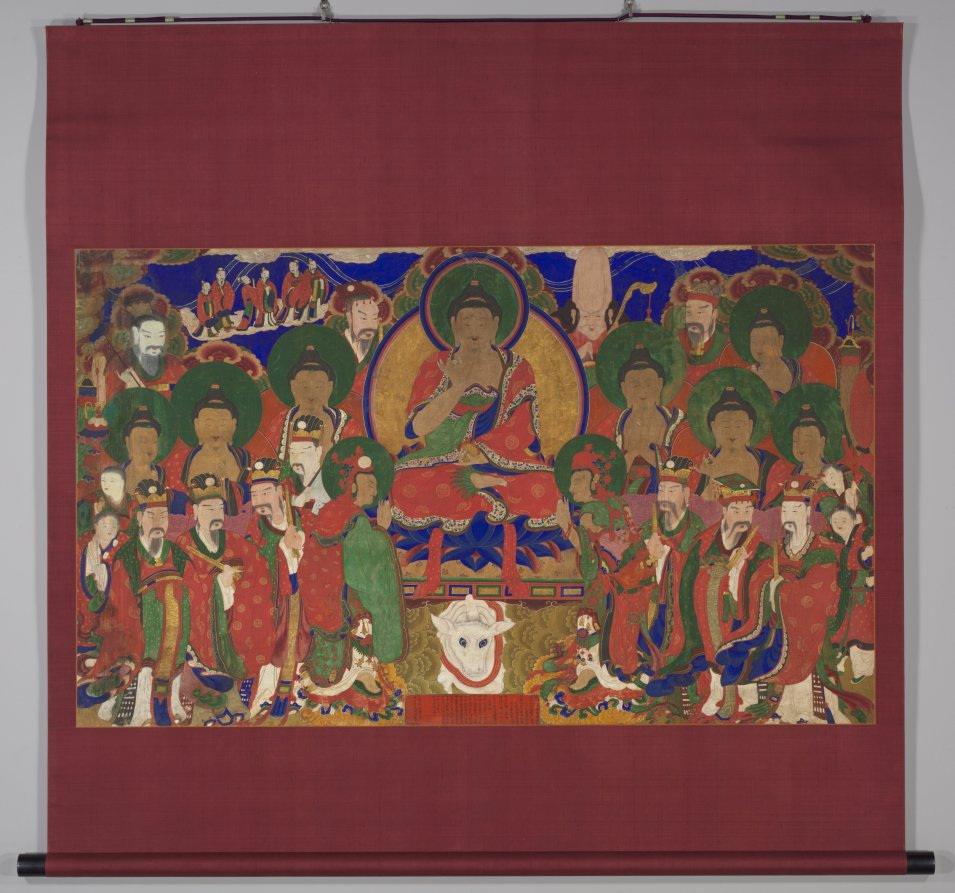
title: The Assembly of Tejaprabha Buddha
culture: Korea, Joseon dynasty (1392–1910)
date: 1878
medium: hanging scroll; ink, color, and gold on silk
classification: Painting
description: The main deity seated at the center is Tejaprabha, the Buddha of Radiant Light. Blazing beams of light emanating from its celestial body are this deity’s weapon to crush all kinds of calamities. Coincidently, when this painting was created, Korea was experiencing a height of foreign military aggressions, including invasions by the French (1866) and the US (1871). The inscription at the bottom center states that a group of ladies from the royal court commissioned the scroll to wish for the well-being of their families. During the late Joseon dynasty, Korean women became largely marginalized. Nevertheless, they remained important patrons of Buddhist art and architecture, voicing their concerns for their country and families in peril.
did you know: The central Buddha of Radiant Light is flanked by two attendant bodhisattvas, Sunlight and Moonlight, each in reverence posture.